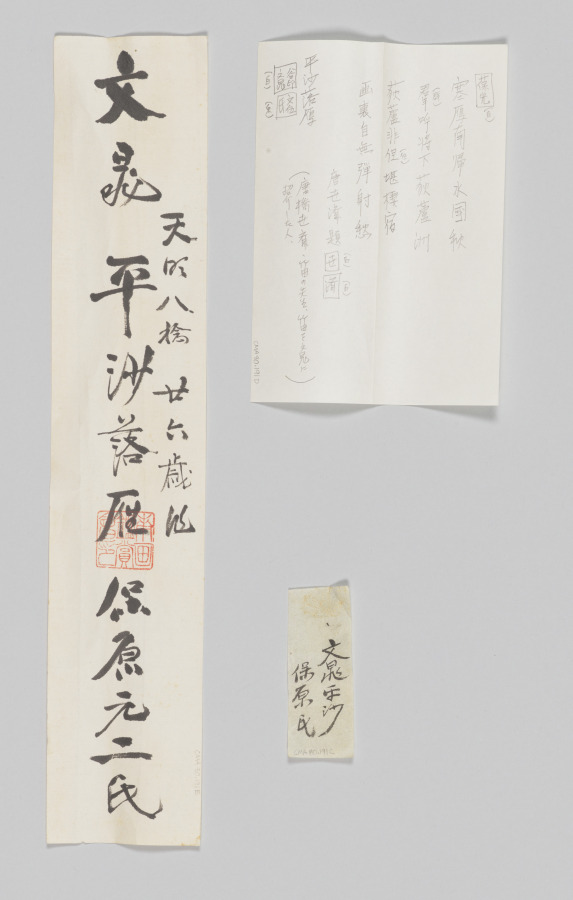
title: Wild Geese Descending on a Sandbar, from Eight Views of Xiao-Xiang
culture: Japan, Edo period (1615–1868)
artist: Tani Bunchō (Japanese, 1763–1841)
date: 1788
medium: album leaf remounted as a hanging scroll; ink and color on paper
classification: Painting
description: This painting was part of a set of album leaves representing the Eight Views of Xiao-Xiang, a theme originating in Chinese poetry and painting that spread to both Korea and Japan. Southern China’s Xiao-Xiang area, where the mist-covered banks of the Xiang River created a complex landscape shifting like the moods and minds of people, captured the imaginations of generations of painters and calligraphers. Inscriptions on these works suggest that they were possibly ordered by newly prominent Japanese Confucian scholars.